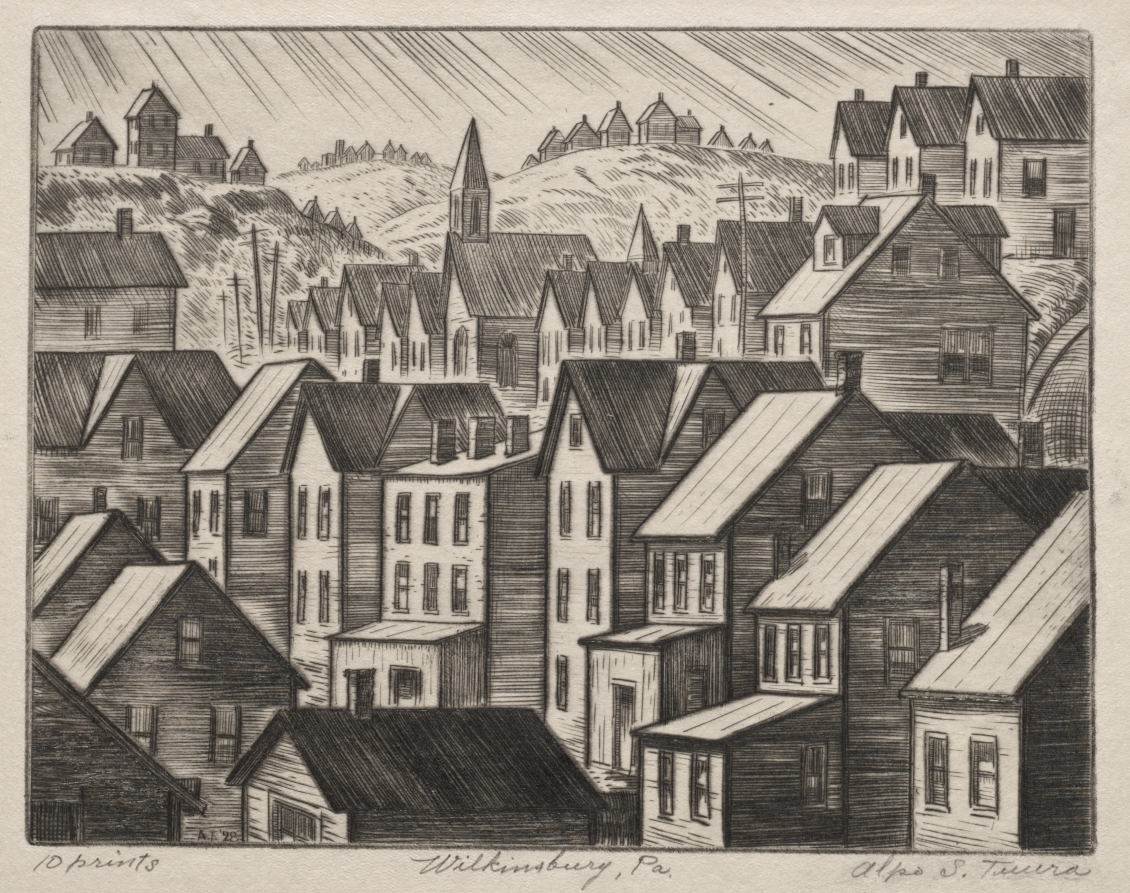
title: Wilkinsburg, Pennsylvania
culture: America, Ohio, Cleveland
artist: Alpo S. Tuura (American, 1902–1928)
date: 1928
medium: etching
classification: Print